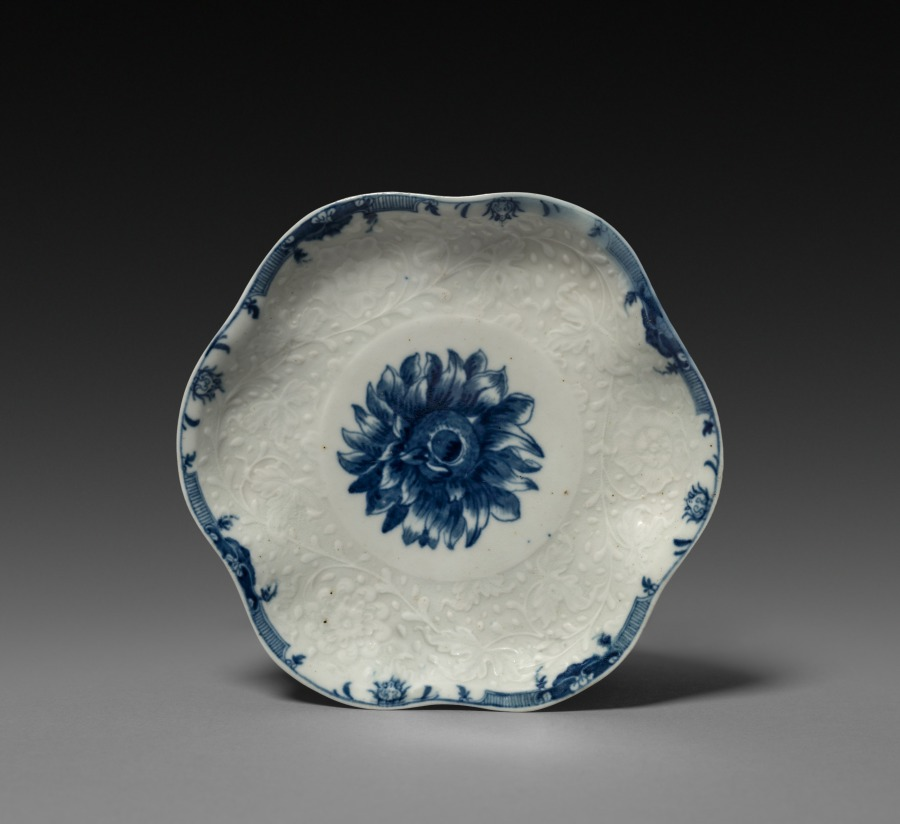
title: Plate with Peony Decoration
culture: England, Worcester, 18th century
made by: Worcester Porcelain Factory (British, established 1751)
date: 1765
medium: soft-paste porcelain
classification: Ceramic